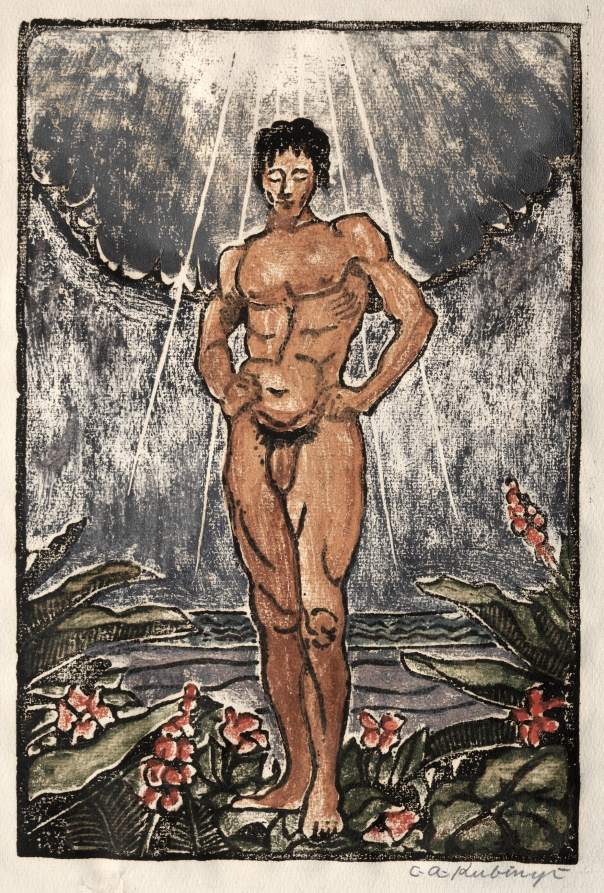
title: The Creation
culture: America, Ohio, Cleveland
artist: Kálmán Kubinyi (American, 1906–1973)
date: before 1927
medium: woodblock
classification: Print